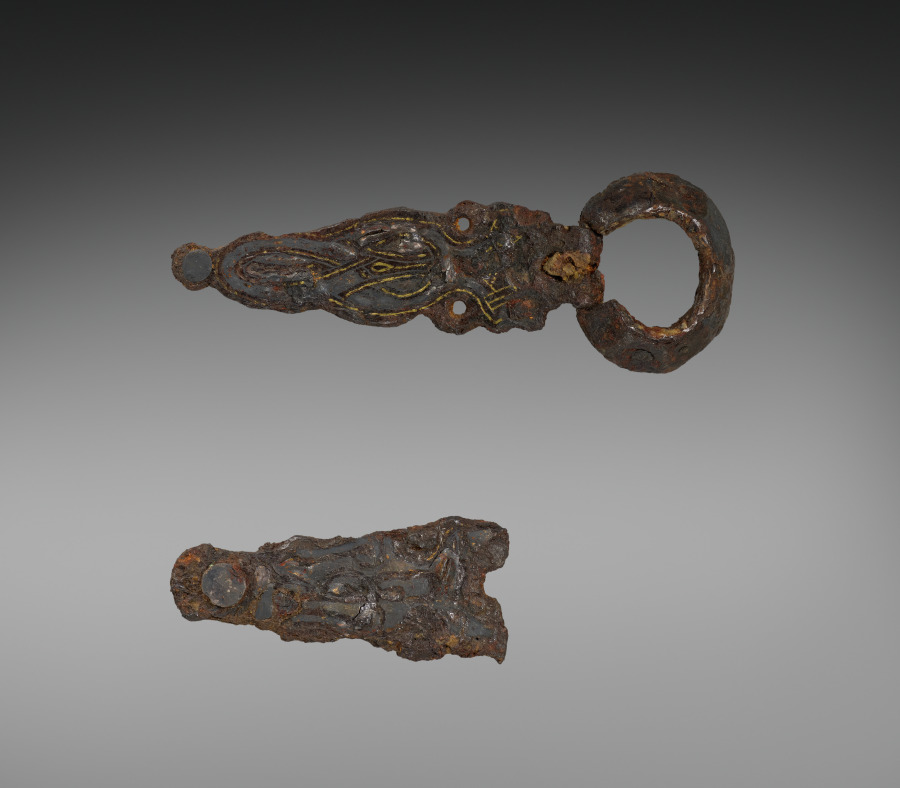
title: Buckles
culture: Merovingian, Burgundian, Migration period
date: 600s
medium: iron with gold and silver overlay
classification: Jewelry